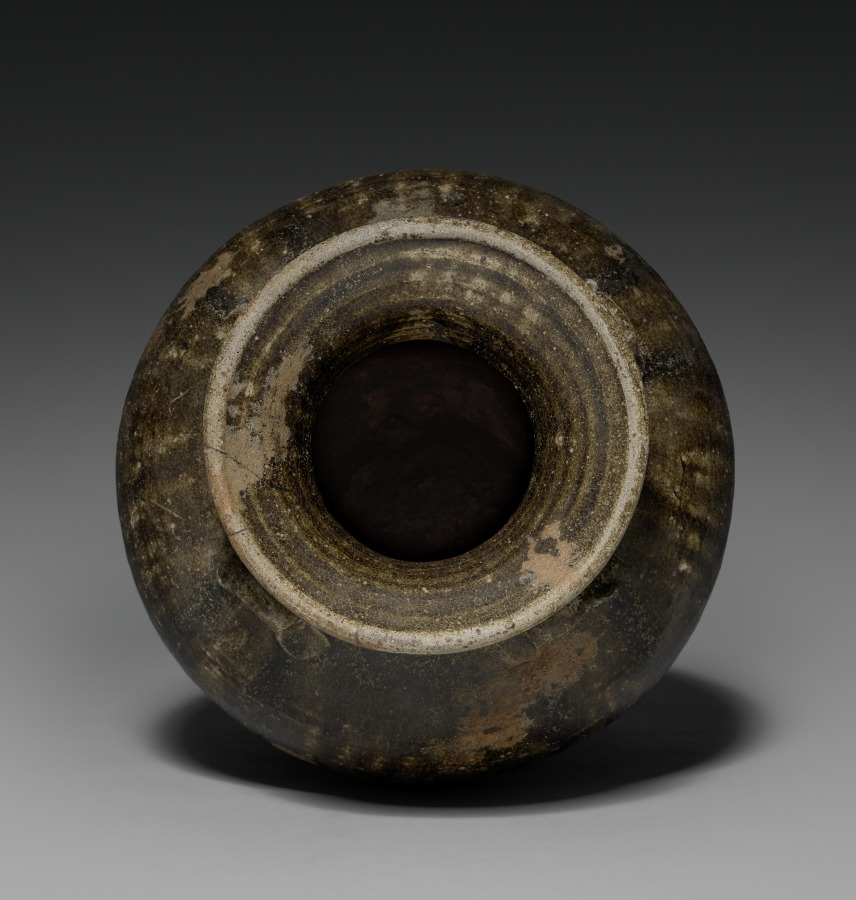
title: Storage Jar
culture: Thailand, Sawankhalok, 14th century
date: 1300s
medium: stoneware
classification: Ceramic